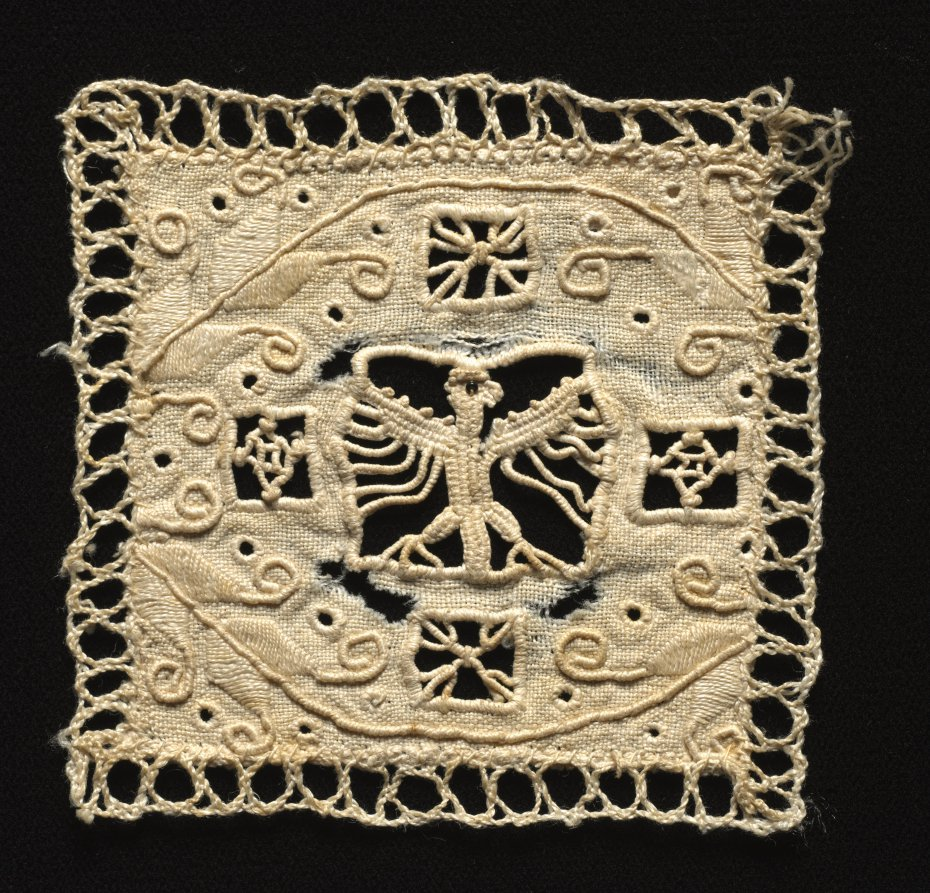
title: Lace Fragment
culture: Italy, 1600s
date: 1600s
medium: lace, needlepoint: linen of Needlepoint (Cutwork) Lace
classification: Lace